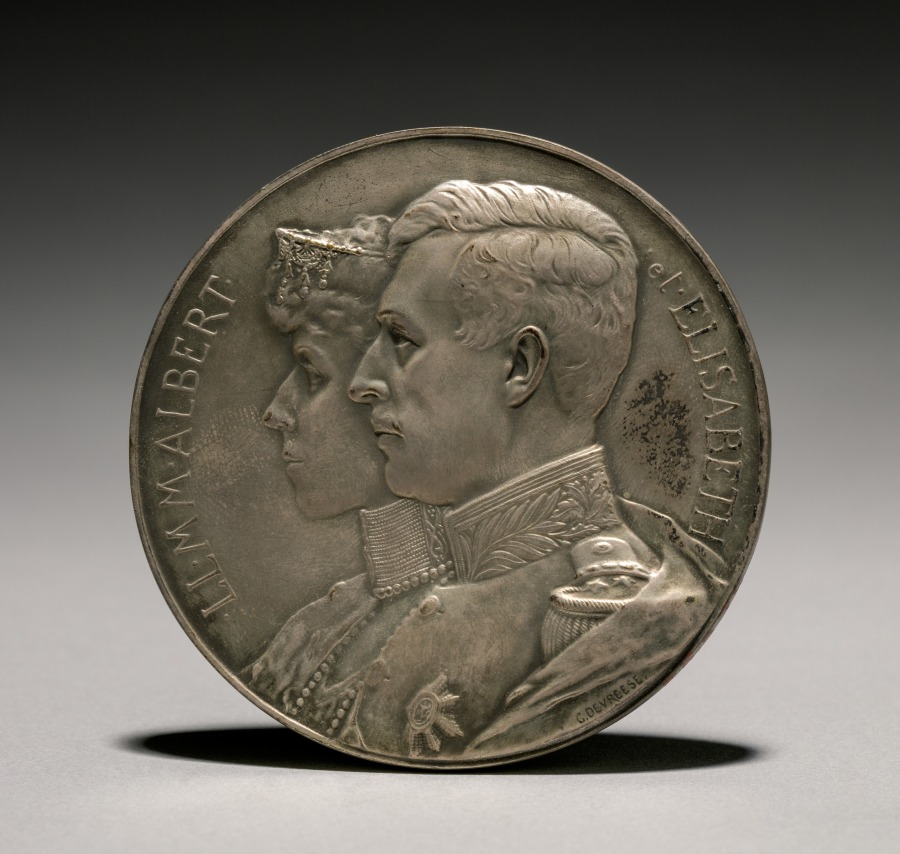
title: Medal (obverse)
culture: Belgium, early 20th century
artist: Godefroid Devreese (Belgian, 1861–1941)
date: 1914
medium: bronze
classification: Metalwork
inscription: "LL.MM.ALBERT et ELISABETH"; signed: "G. Debreese."